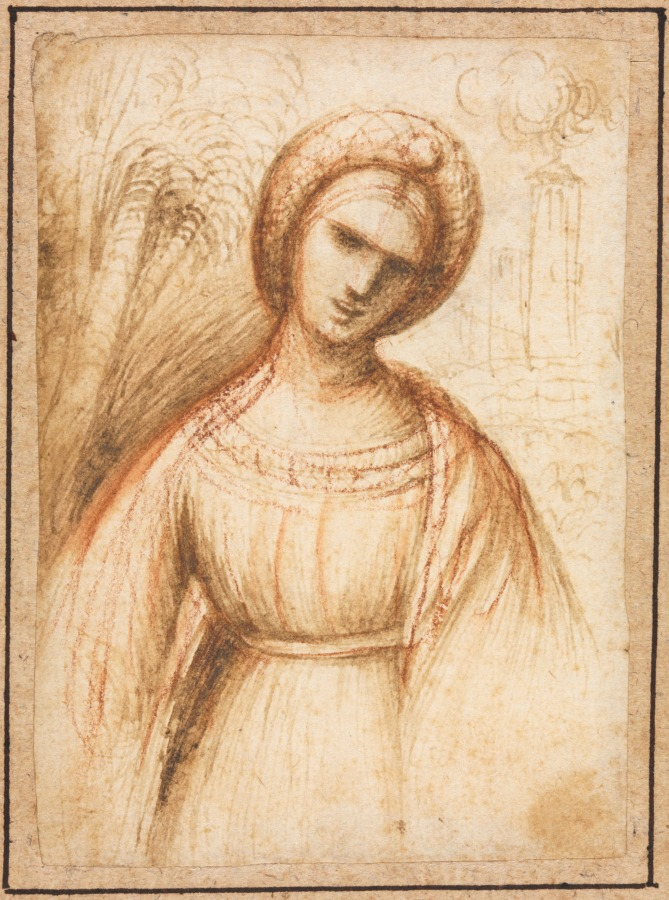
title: Lady in a Landscape (recto); Bust-Length Profile of an Old Woman (verso)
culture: Italy, Ferrarese, 16th century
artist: possibly by Dosso Dossi (Italian, c. 1490–after 1541)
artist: Giuseppe Caletti (Italian, 1590-1670)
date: c. 1630–60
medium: brush and brown wash and red chalk (extended with brush and water in places)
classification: Drawing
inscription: recto: SECONDARY SUPPORT, lower center, in graphite: F[ran?] Francia verso: across top and center, in brown ink: si lacha e nero e questo si fa [illegible] / inte nerire, ci lumi poi si / rischiara la tinta da cham[illegible] / hon quasi niente di R[a?]ch[i?] / [l?]a tinta di nero [se?]ra rosa / quo[illegible] niente di lacha